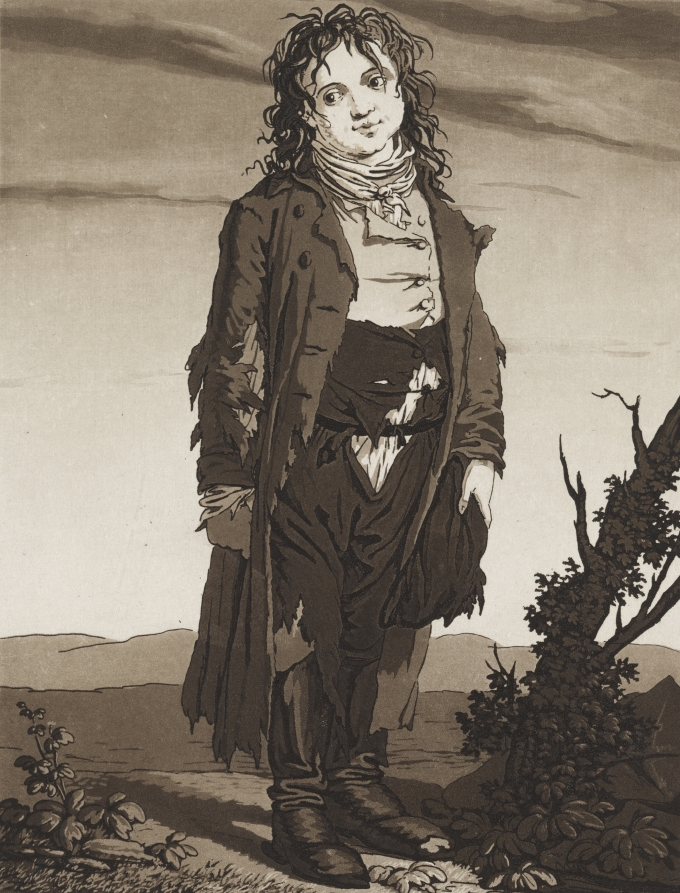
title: The Young Beggars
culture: Germany, late 18th-early 19th century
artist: Karl Ludwig Bernhard Buchhorn (German, 1770–1856)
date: c. 1800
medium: aquatint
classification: Print